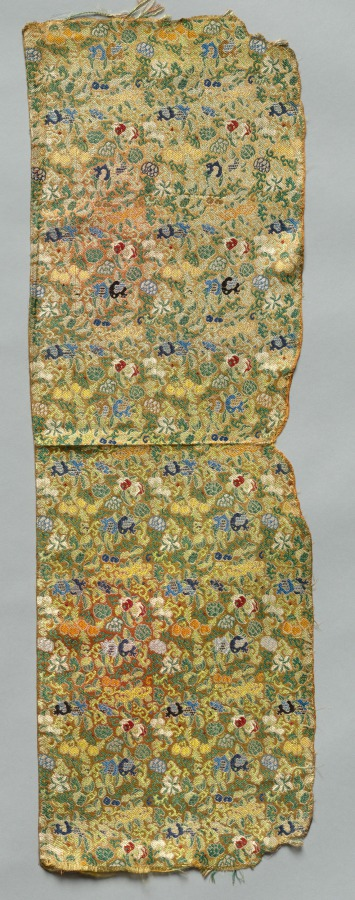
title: Fragment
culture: China, Qing dynasty (1644-1911)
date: 1800s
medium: Silk; damask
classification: Textile